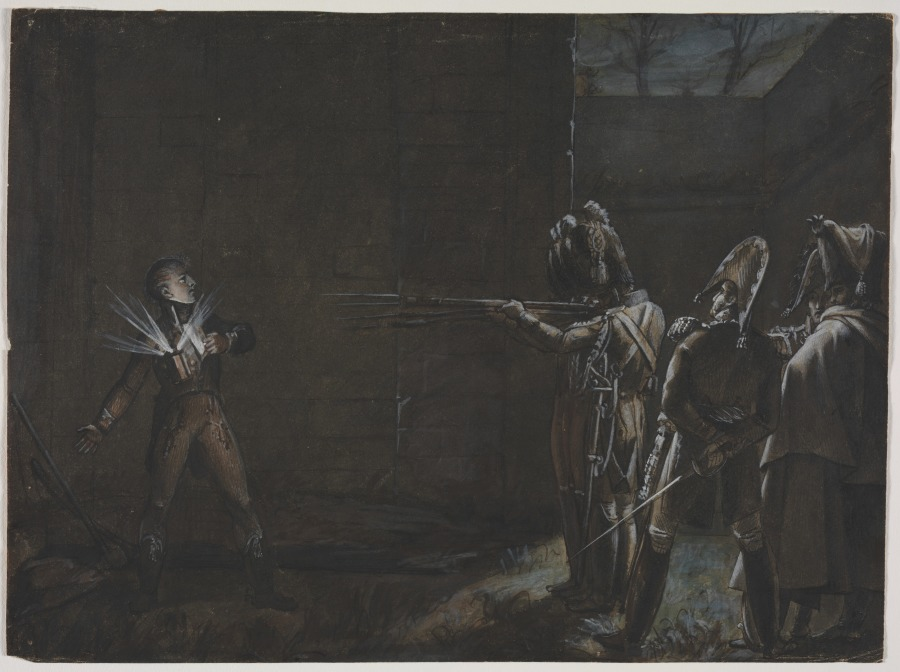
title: Execution of the Duke d'Enghien, 21 March 1804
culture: France, 19th century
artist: Anonymous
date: c. 1870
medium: brown ink wash, pen and brown ink, with white and blue-gray gouache highlights on medium-weight wove paper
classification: Drawing